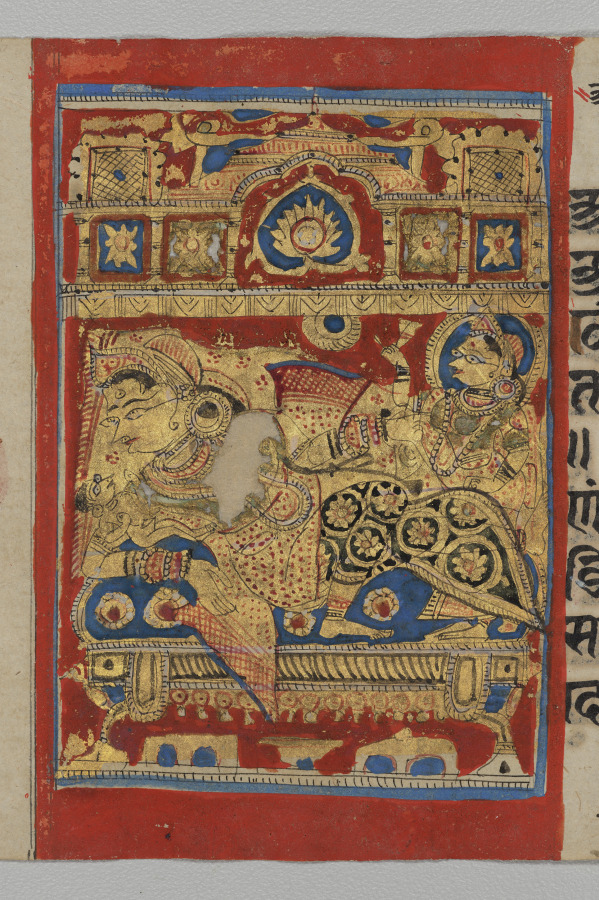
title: Birth of Parshva, Folio 45 (recto), from a Kalpa-sutra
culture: Western India, Gujarat, late 15th-early 16th century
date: c. 1500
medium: Gum tempera, ink, and gold on paper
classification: Painting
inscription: [[upper left]] Śrī Pārśva janma